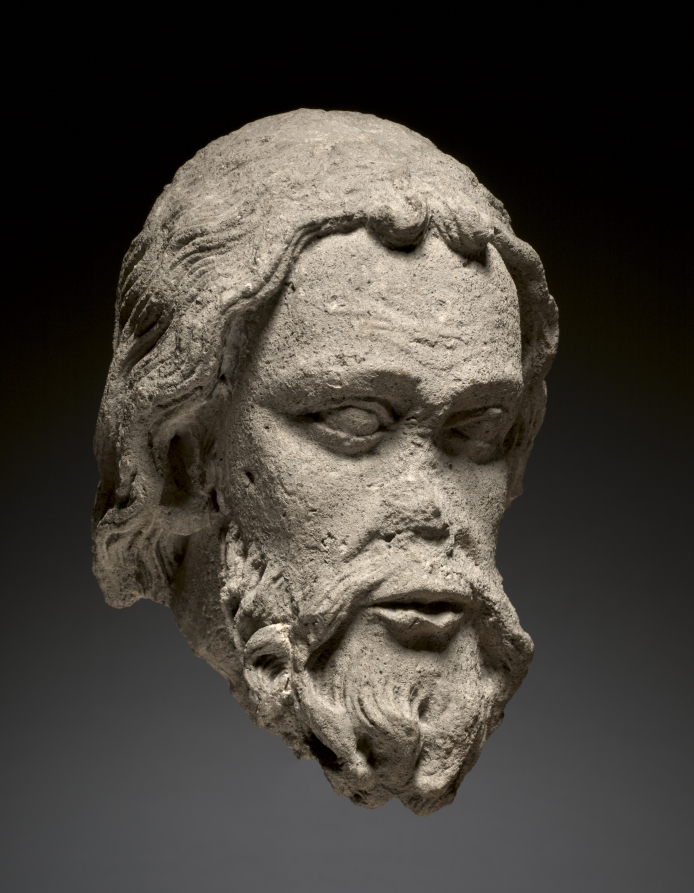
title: Head of an Apostle from the South Portal of the Cathedral of Thérouanne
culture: Northern France (Pas-de-Calais), Thérouanne, 13th century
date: c. 1235–1240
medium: oolitic limestone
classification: Sculpture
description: These monumental stone heads are among the substantial known remains of the sculptural program of Thérouanne’s cathedral, which was razed by Emperor Charles V of Spain in June 1553. These heads were found in a wall of rue Ste. Croix in the town of Saint Omer (a short distance to the north) in January 1923. This group of sculptures from the gable of the south portal of Thérouanne, which includes a stylistically related Christ as Judge, is recorded to have been moved to the Cathedral of Saint Omer in 1554. With their deeply carved wavy hair, curly beards, wrinkled foreheads, and ponderous facial features, these imposing heads—even in their now fragmentary and weathered state—attest to the powerful monumentality of the stone sculpture covering French church facades of the Gothic period.